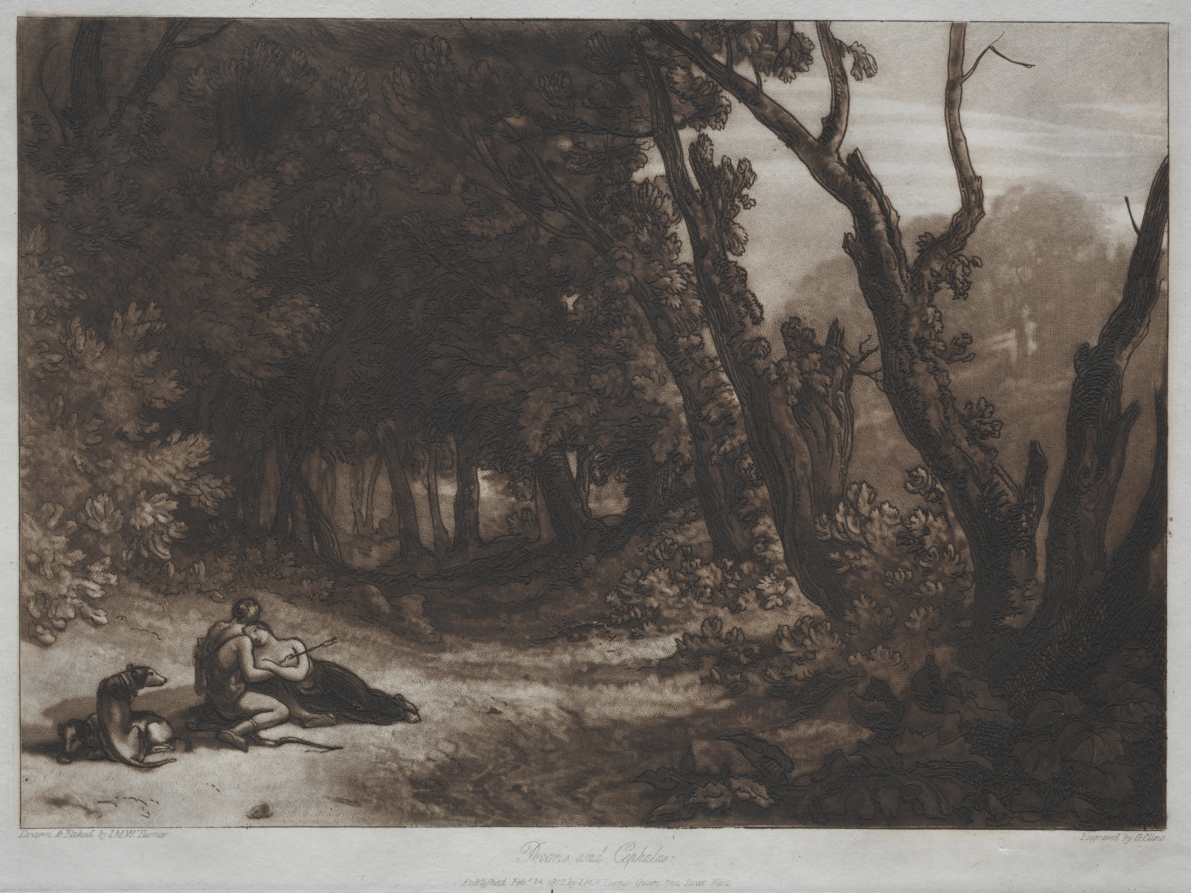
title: Liber Studiorum: Procris and Cephalus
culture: England, 19th century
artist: Joseph Mallord William Turner (British, 1775–1851)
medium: etching and mezzotint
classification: Print